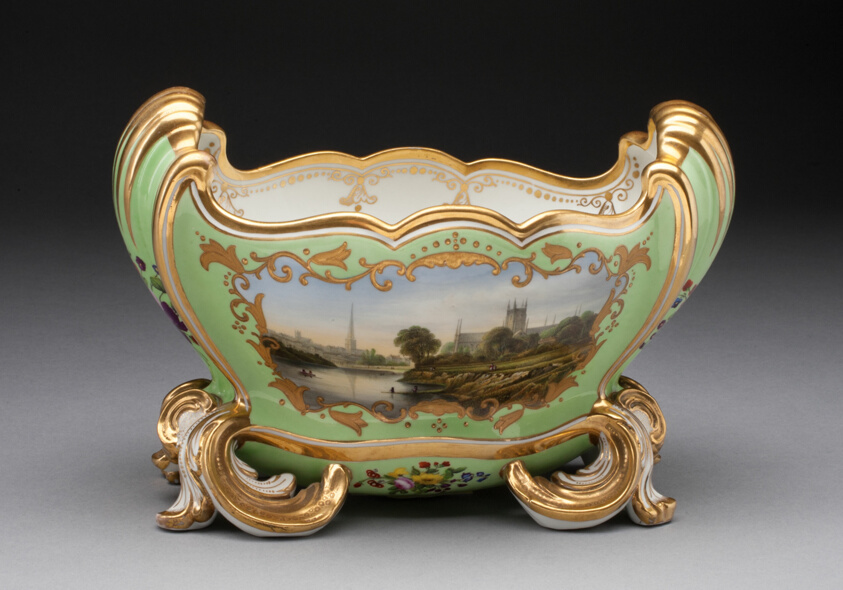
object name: Ceramics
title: Flower Vase with view of Worcester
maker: Worcester Porcelain Factory (Flight, Barr & Barr Period,1813—1840); Worcester, England, founded 1751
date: c. 1820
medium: Soft-paste porcelain with green ground, polychrome enamels and gilding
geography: Worcester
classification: vase; vessel; porcelain; ceramics; european decorative arts